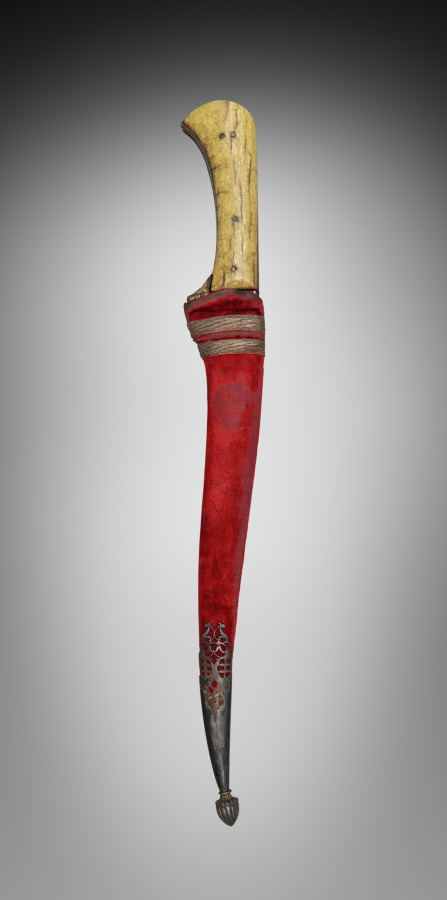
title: Knife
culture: Afghanistan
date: 1700s–1800s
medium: inlaid gold with ivory hilt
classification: Arms and Armor